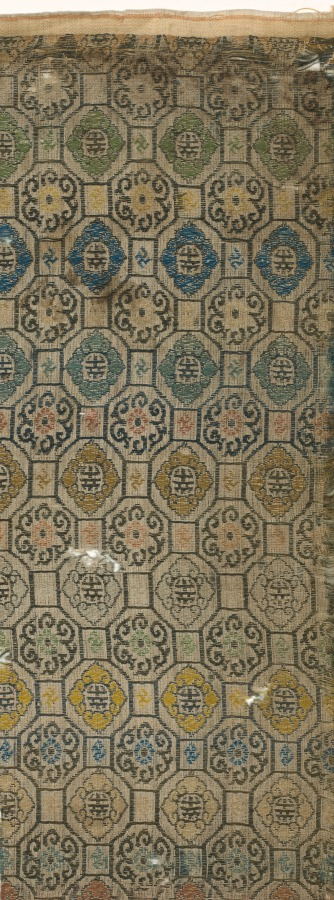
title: Fragment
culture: China, 19th century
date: 1800s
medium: silk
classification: Textile